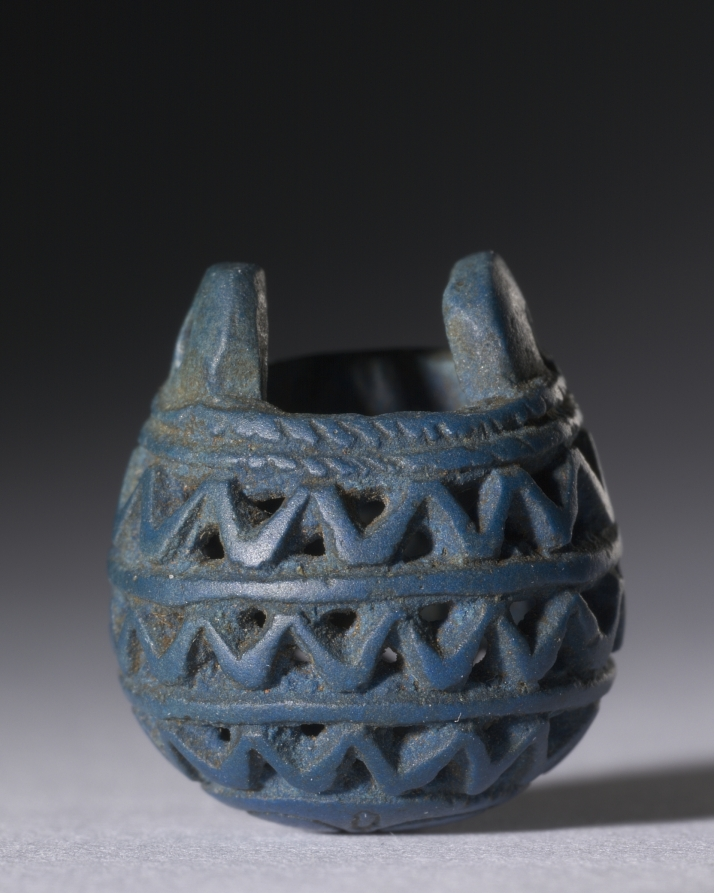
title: Model Basket as Amulet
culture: Egypt, Third Intermediate (1069–715 BCE), Dynasties 21–22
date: c. 1069–945 BCE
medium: Egyptian blue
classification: Sculpture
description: As an amulet, the basket was associated with the cat-goddess Bastet. Statuettes of Bastet frequently show her carrying basketfuls of kittens. This amulet is remarkable for its openwork design